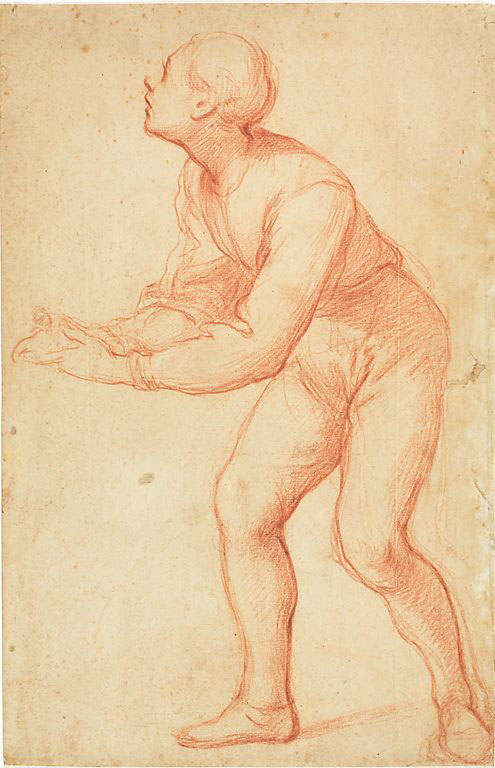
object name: Drawing and Watercolor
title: Standing Young Man With Outstretched Arms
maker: Attributed to Giovanni Balducci, called il Cosci; Italian, c. 1560-1631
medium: Red chalk, on cream laid paper, laid down on ivory wove paper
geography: Italy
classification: chalk; drawings (visual works); prints and drawing